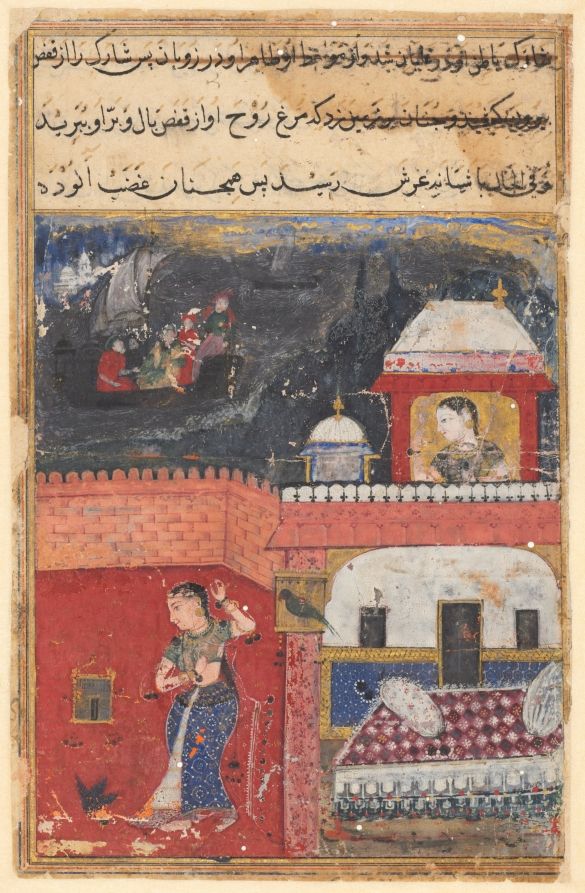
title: Khujasta kills the pet mynah who advises her not to be unfaithful to Maymun, her husband, from a Tuti-nama (Tales of the Parrot): First Night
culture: Mughal India, court of Akbar (reigned 1556–1605)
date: c. 1560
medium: gum tempera, ink, and gold on paper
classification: Painting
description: The first illustration of the Cleveland Tuti-Nama shows the merchant departing and his wife killing the mynah bird that tells her not to commit adultery. The bright red background and composition are Indian, while the delicacy of drawing is Persian, and the atmospheric effects in the upper left are a Mughal development.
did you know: Merchant ships brave treacherous waters; a distant city appears in the upper left.